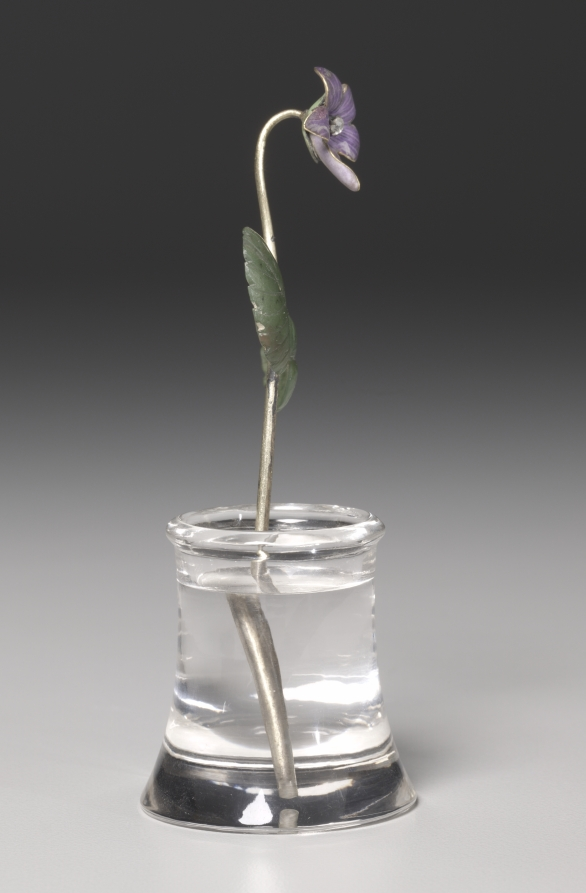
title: Flower Study of a Violet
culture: Russia, St. Petersburg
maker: House of Fabergé (Russian, 1842–1918)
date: c. 1885–1915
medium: enamel, silver gilt, jade, diamond, rock crystal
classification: Miscellaneous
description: This flower study depicts a single stem of violet. Fabergé’s inspiration for his flower studies is said to have come from the floral brooches of precious stones that were made in the 1700s for Catherine the Great as well as from the Japanese art of flower arranging, known as ikebana. Small and delicate, Fabergé’s flower studies were given as intimate gifts to friends by the tsarina and others in the court. She also liked to take them around to wherever the imperial family was residing as a reminder of spring during the harsh Russian winters.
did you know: The stems of Fabergé’s flower studies are set into little basins carved from rock crystal to resemble pots of water.